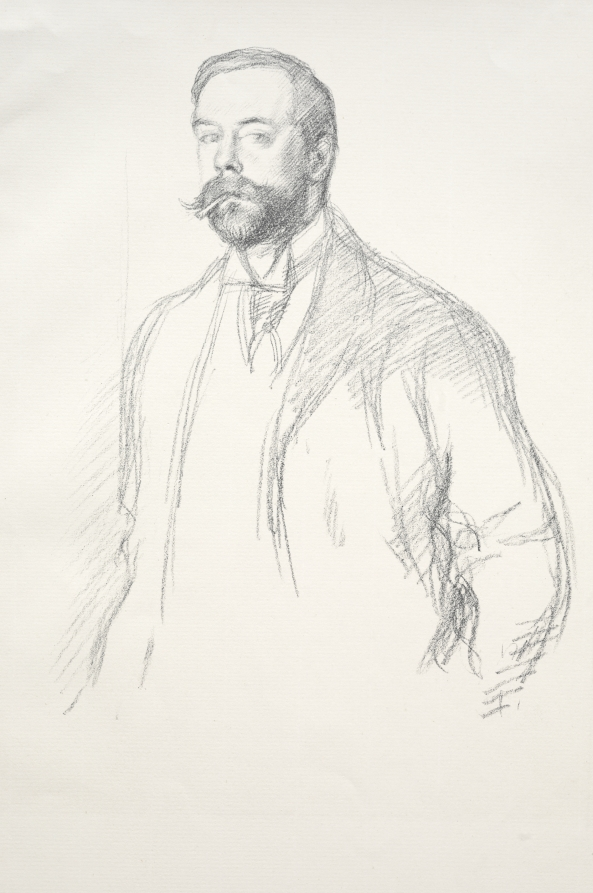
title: John Singer Sargent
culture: England, 20th century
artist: William Rothenstein (British, 1872–1945)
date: c. 1897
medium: lithograph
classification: Print